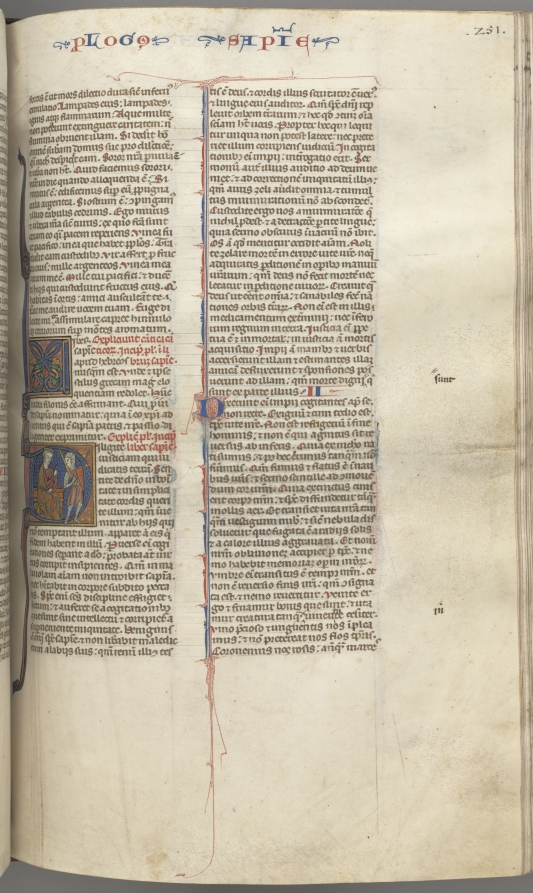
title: Fol. 251 r, Wisdom, historiated initial D, Solomon instructing a soldier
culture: Southern France, Toulouse(?), 13th century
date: c. 1275–1300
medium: ink, tempera and gold on vellum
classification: Bound Volume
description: Biblical manuscripts were highly prized and important possessions of churches, monasteries, cathedral schools, and universities throughout medieval Europe. The biblical texts were known as the vulgate, the translations made by Saint Jerome in the fourth century from Hebrew and Greek into Latin, which became the definitive and official Latin version of the Roman Church. In the 13th century, the bible was, for the first time, produced as a single volume with an officially sanctioned sequence to its books and chapters as illustrated by this example. The very extensive decoration of this bible is arranged hierarchically to indicate the relative importance of the various texts so that full or almost full-page initials mark the openings of the first prologue, Genesis, and the first Gospel; historiated initials mark the beginning of each book and illuminated initials mark the Prologues.